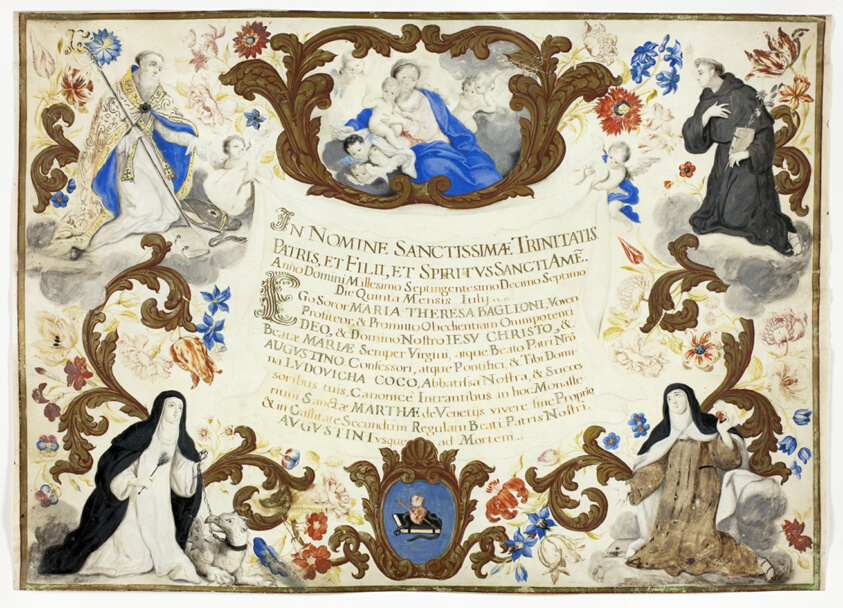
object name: Drawing and Watercolor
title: Investiture Certificate of Sister Maria Theresa Baglioni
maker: Artist Unknown; Italy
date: June 5, 1717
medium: Manuscript cutting in opaque and translucent water-based paint and metalic paint over traces of black chalk on parchment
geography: Italy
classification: tempera; drawings (visual works); prints and drawing